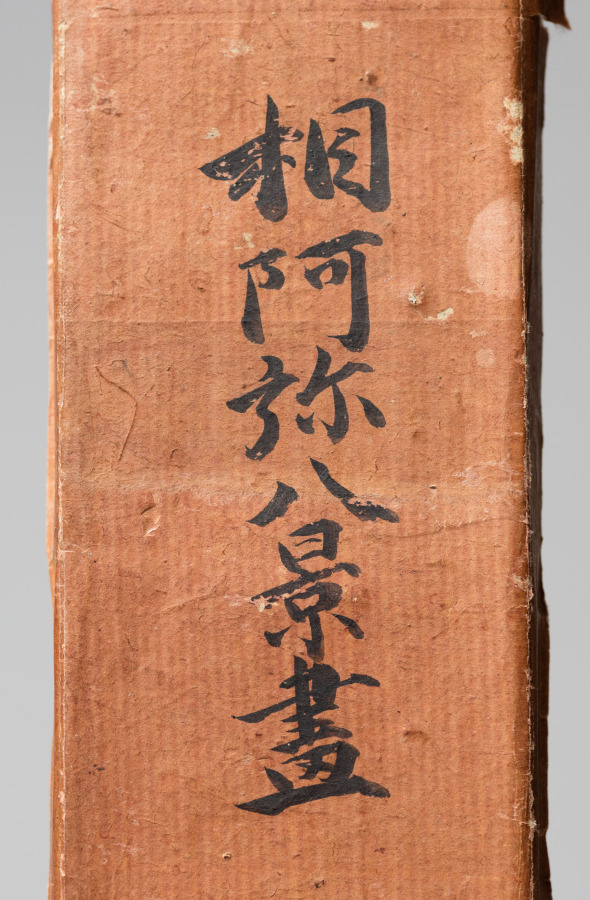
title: Landscape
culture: Japan, Edo period (1615–1868)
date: early 1600s to mid-1800s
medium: hanging scroll; ink on paper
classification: Painting